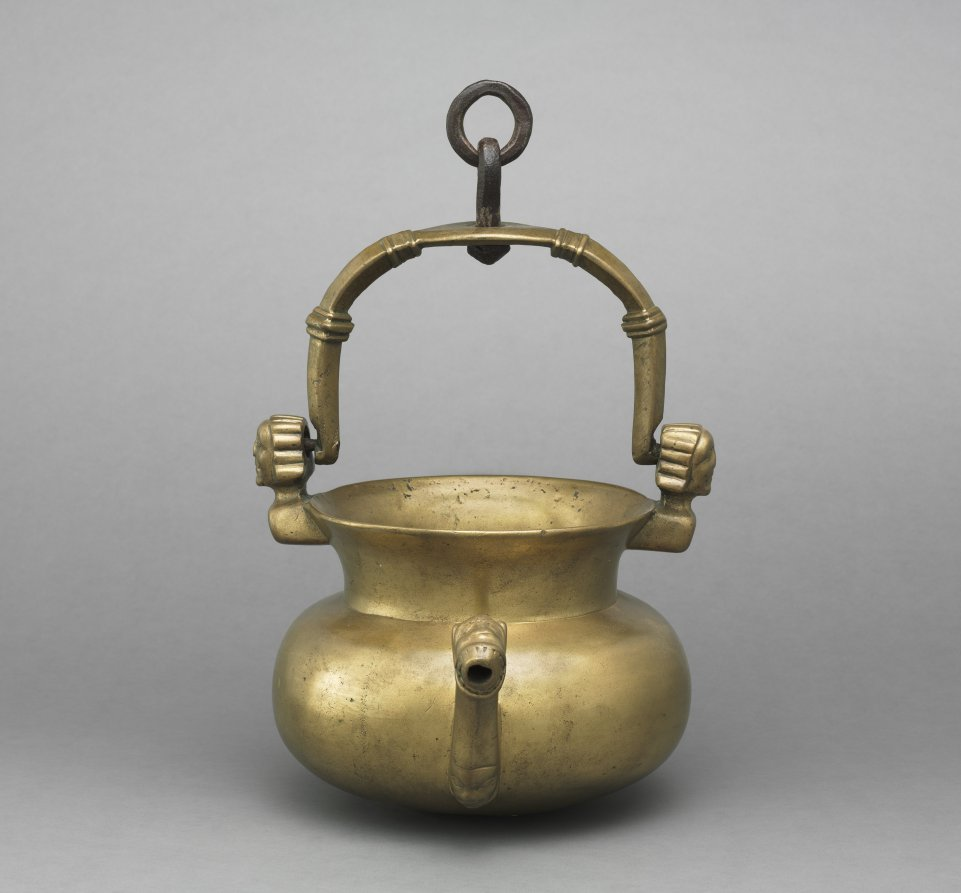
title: Lavabo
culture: South Netherlands, Valley of the Meuse, 15th century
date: 1400s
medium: brass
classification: Metalwork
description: In the Middle Ages a variety of vessels were used for hand washing. This brass container, called a lavabo, was designed to hold a large quantity of water and may have functioned in either a domestic or a liturgical setting. Its large capacity and relatively simple decoration suggests it served a communal function, either in a private home or perhaps in a monastery where it would have served as a hand-washing station near the refectory. In private homes, lavabos of similar design were usually hung from a chain or a trammel hook over or near the fire in the kitchen. The ring inserted at the top of the handle would have allowed for the rotation of the vessel while it was suspended, facilitating access to the spouts for water. Seen in conjunction with other vessels displayed nearby, this object illustrates the variety of hand-washing vessels used by medieval men and women.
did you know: On either side of the handle appear two human faces while the spouts themselves are animals, perhaps lions or dogs.